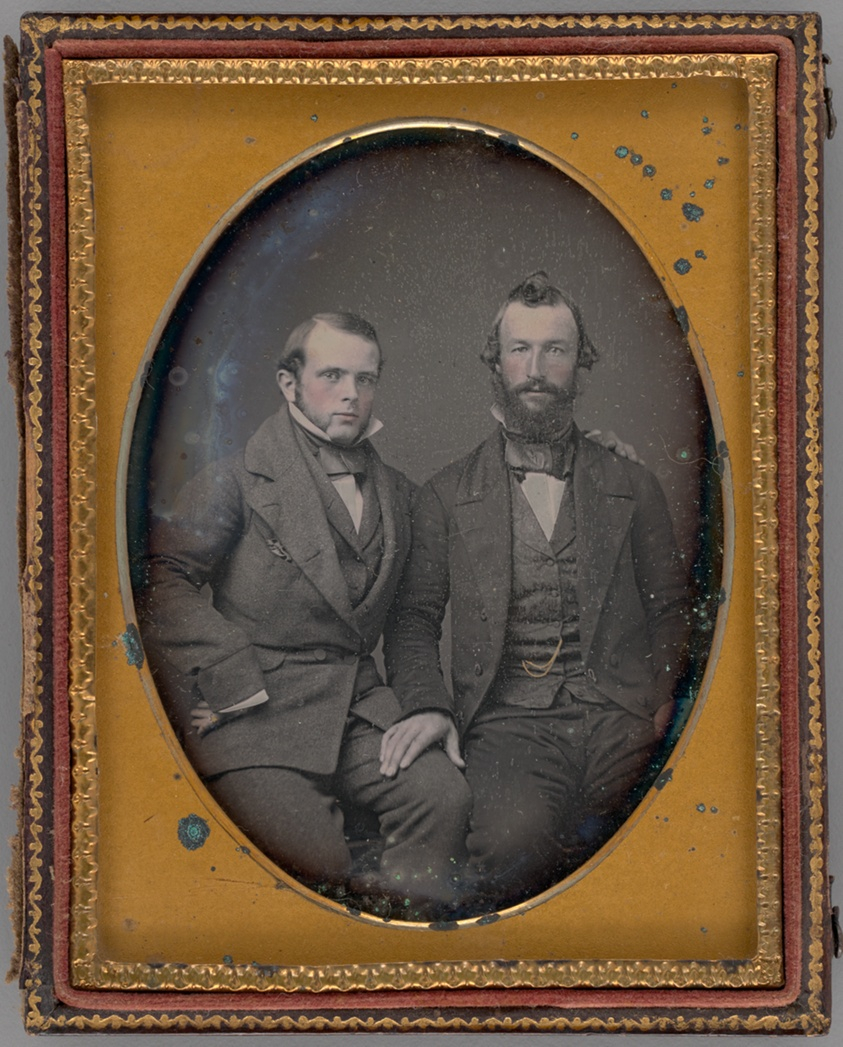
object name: Photograph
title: Untitled (Portrait of Two Men)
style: 19th century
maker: Robert H. Vance (American, 1825-1876)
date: 1855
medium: Daguerreotype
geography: United States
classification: portrait; photograph; photographic process; photography; portrait; daguerreotype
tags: lundberg collection, portraits, Male, portrait, portraits: male subject, portraits: multiple subjects